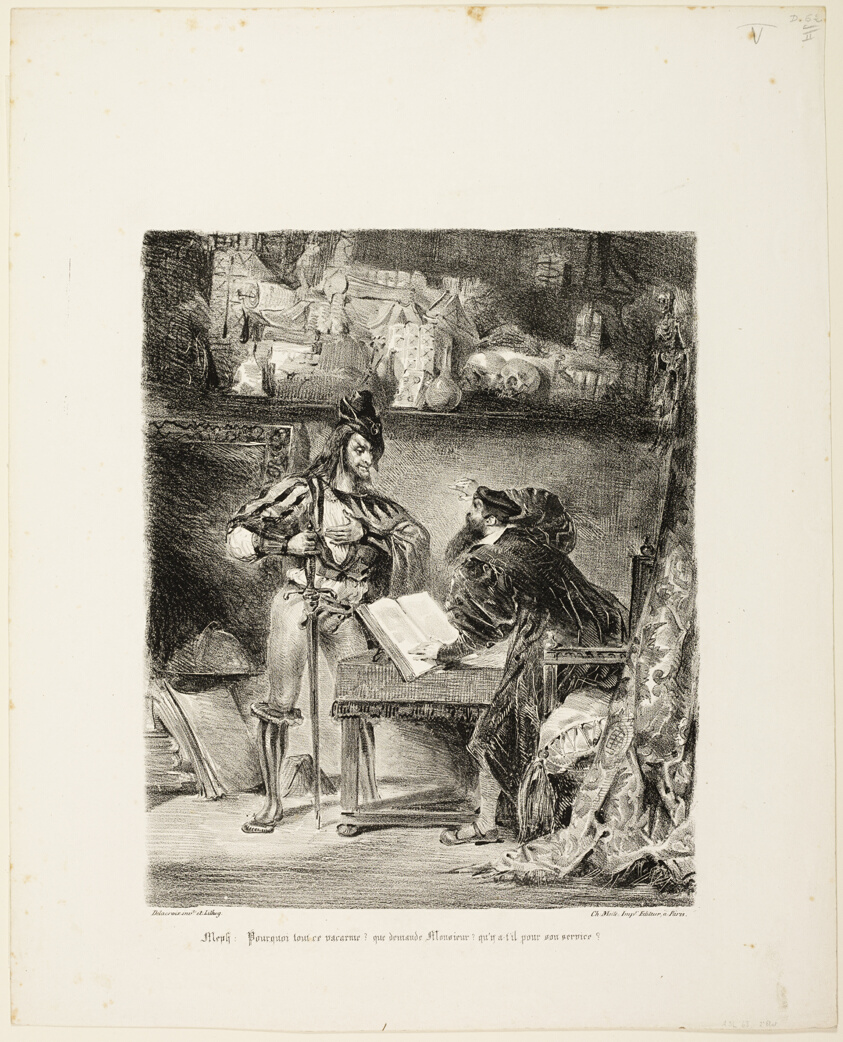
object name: Print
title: Mephistopheles Appearing to Faust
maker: Eugène Delacroix (French, 1798-1863)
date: 1828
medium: Lithograph in black on ivory wove paper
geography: France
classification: lithograph; print; prints and drawing